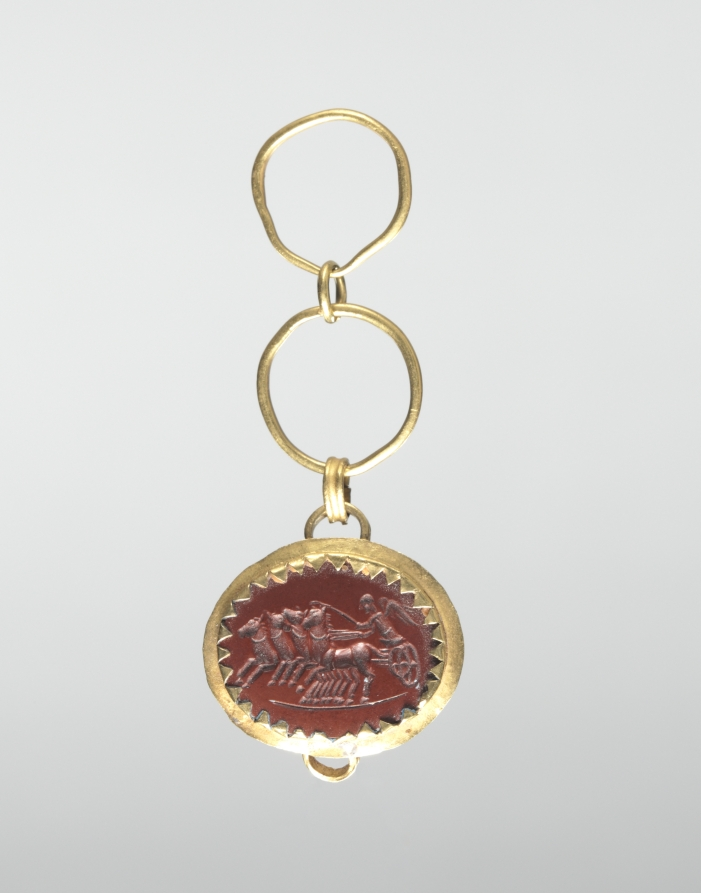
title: Intaglio: Victory in a Chariot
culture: Italy, Roman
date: 1–200 CE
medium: red jasper in gold mount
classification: Jewelry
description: This oval jasper gemstone is incised with a scene of the goddess Victory in a chariot being pulled by four galloping horses. The horses’ hind hooves all touch a curved ground line at the bottom of the composition. The stone is set in a gold mount with toothed edges holding it in place, attached by a loop to two additional gold rings.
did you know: Winged Victory, or Nike, is shown riding a four-horse chariot, likely a good luck charm for the owner.